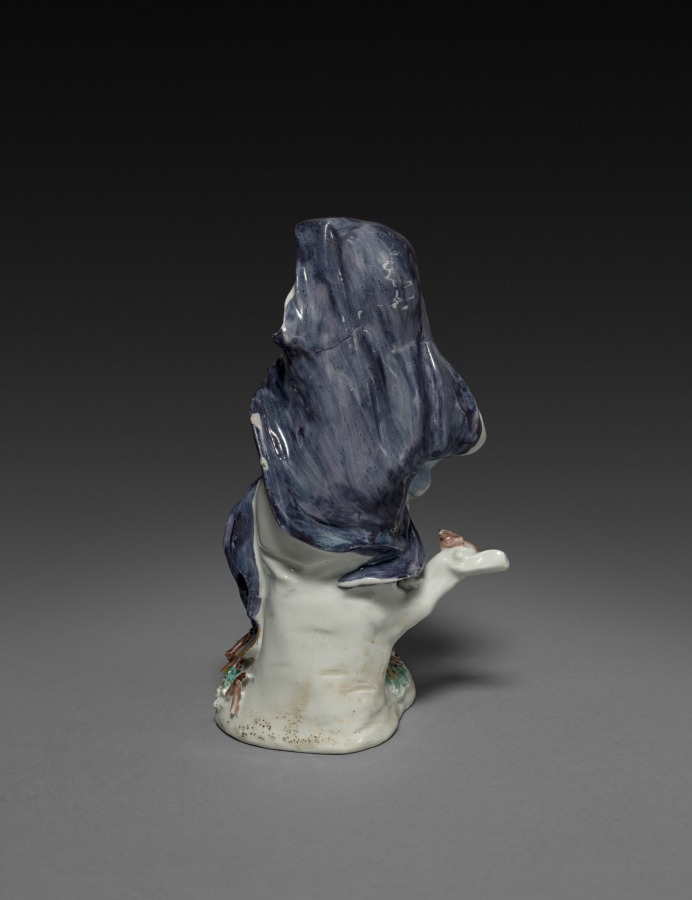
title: Winter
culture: England (Derby), 18th century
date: c. 1760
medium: soft-paste porcelain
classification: Ceramic